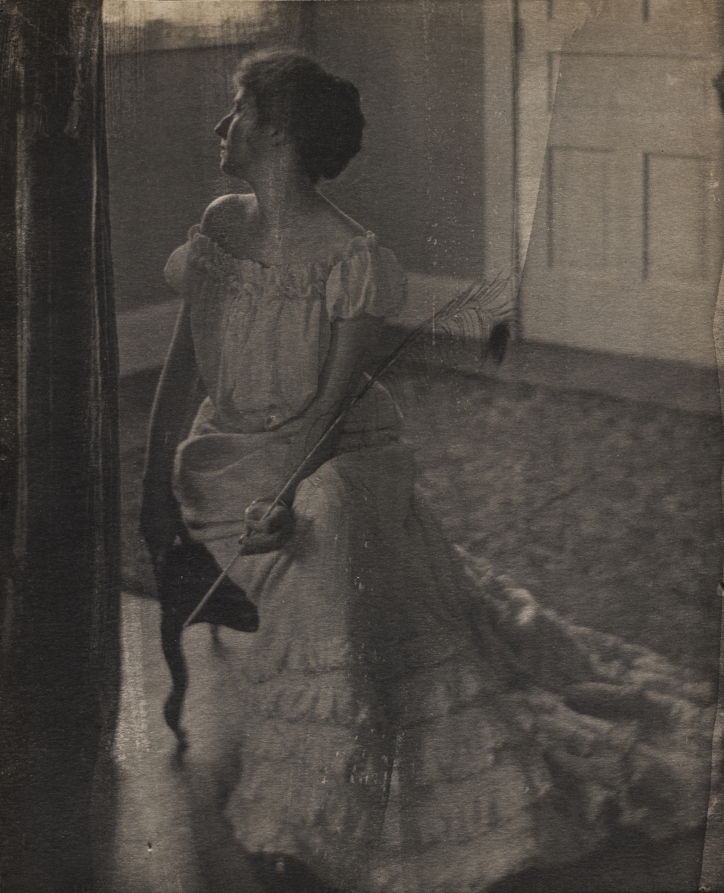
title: The Peacock Feather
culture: America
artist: Clarence H. White (American, 1871–1925)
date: c. 1902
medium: platinum print with graphite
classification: Photograph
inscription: Written in pencil on verso: "18 [circled]"; "The Peacock Feather - Portrait of / Julia McCune"